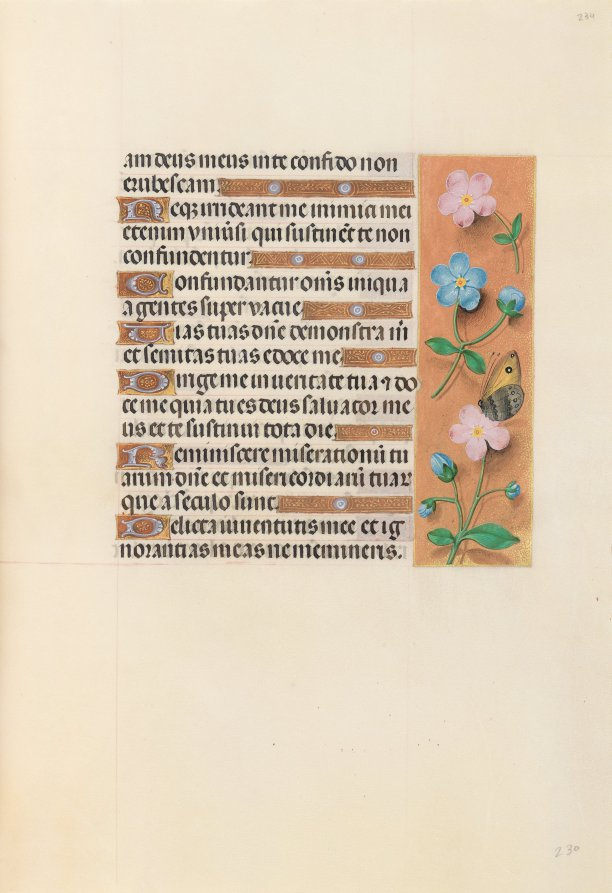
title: Hours of Queen Isabella the Catholic, Queen of Spain: Fol. 234r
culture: Flanders, Ghent and Bruges, late 15th century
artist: Master of the First Prayerbook of Maximillian (Flemish, c. 1444–1519)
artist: and Associates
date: c. 1500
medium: ink, tempera, and gold on vellum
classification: Bound Volume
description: This manuscript was illuminated by a circle of at least five highly organized manuscript painters active in the Flemish cities of Ghent and Bruges. The principal illuminator was Alexander Bening, who painted the majority of the book's miniatures. Manuscripts produced by this circle of artists are renowned for the decoration of their borders, which typically feature a rich variety of realistically-painted flowers, birds, and butterflies. This prayer book, called a book of hours, was intended not for a cleric, but for the private devotions of a lay person-in this case, Isabella the Catholic, Queen of Spain (1451-1504). Isabella's coat of arms embellishes the book's frontispiece. It is unlikely that the book was commissioned by the Queen herself; rather, she probably received it as a diplomatic gift from someone courting her patronage, perhaps Cardinal Francisco Jimenez de Cisneros. A Franciscan friar, Jimenez was dependent upon Isabella for his advancement, first to the post of Queen's confessor in 1492, and then to Archbishop of Toledo in 1495.